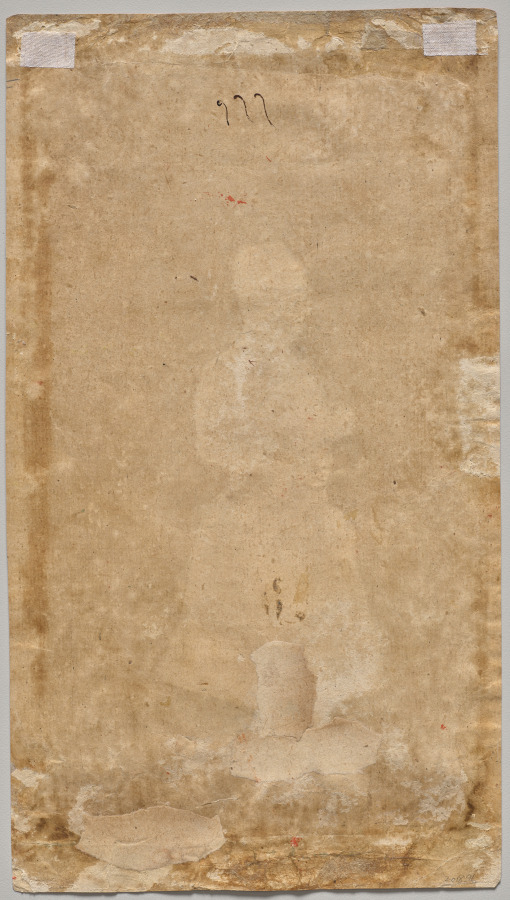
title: Raja Hari Sen of Mandi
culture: Northern India, Pahari kingdoms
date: c. 1650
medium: Gum tempera, ink, and gold on paper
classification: Painting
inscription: 111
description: In the portrait, the raja is depicted clad in a gheradar jama tied with a short-length pataka, a feature of Jahangir-era fashion. He stands confidently against a monochromatic fern green backdrop, with his left hand supporting his sword in a mauve sheath while his right hand reaches toward his dagger securely tucked in his belt.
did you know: Raja Hari Sen adorns a Jahangir-style turban which was out of imperial fashion at the time of portraiture